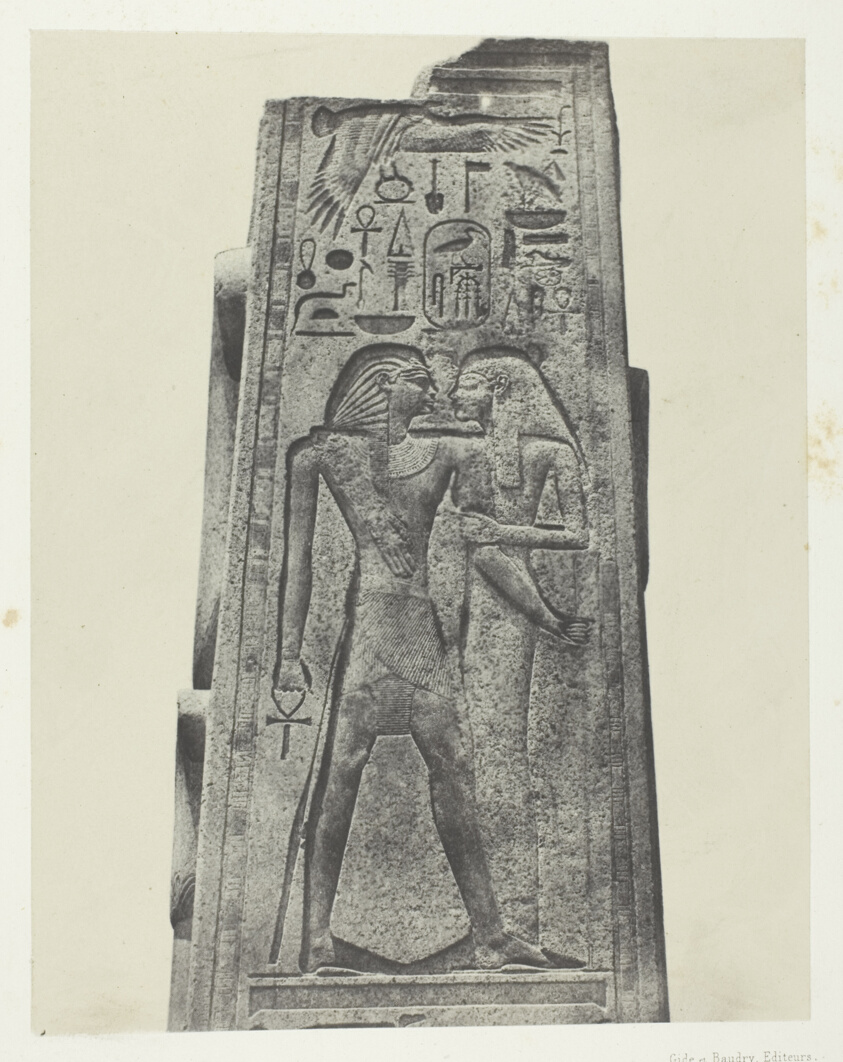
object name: Photograph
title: Palais de Karnak, Pilier Devant le Sanctuaire de Granit; Thèbes, plate 38 from the album "Egypte, Nubie, Palestine et Syrie" (1852)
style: 19th century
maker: Maxime Du Camp (French, 1822–1894)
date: 1849/51, printed 1852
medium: Salted paper print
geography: France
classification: salted paper print; photographic process; photography; photograph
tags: Collected by Hugh Edwards, Egypte, Nubie, Palestine et Syrie